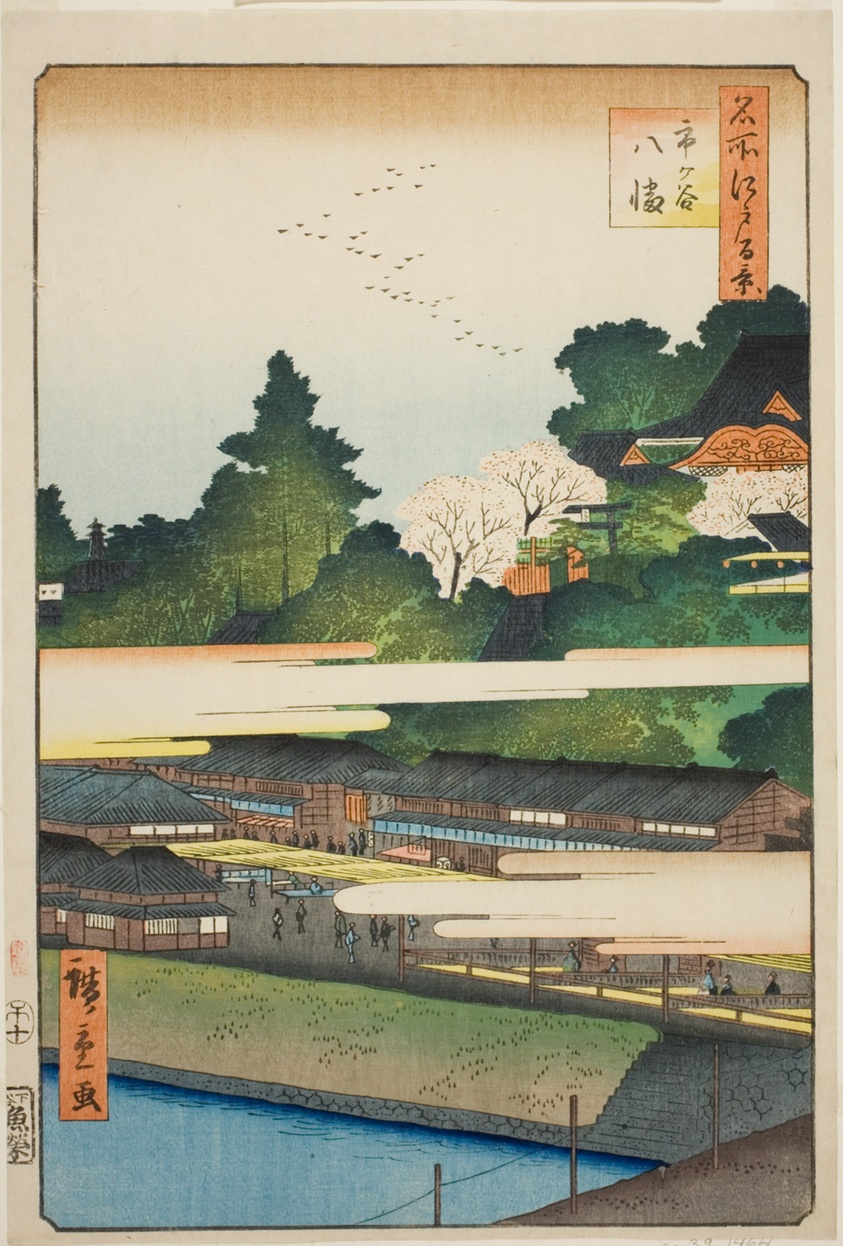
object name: Print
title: Ichigaya Hachiman Shrine (Ichigaya Hachiman), from the series “One Hundred Famous Views of Edo (Meisho Edo hyakkei)”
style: Japanese (culture or style)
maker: Utagawa Hiroshige 歌川 広重; Japanese, 1797-1858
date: 1858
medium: Color woodblock print; oban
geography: Japan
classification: woodblock print; print; asian art